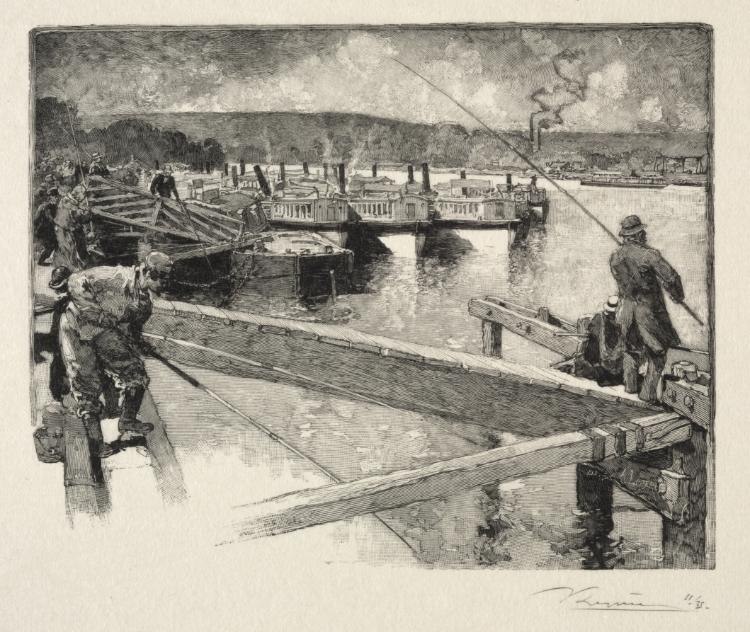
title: Le garage des bateaux-omnibus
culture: France, 19th-20th century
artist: Auguste Louis Lepère (French, 1849–1918)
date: c. 1870–1918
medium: wood engraving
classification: Print